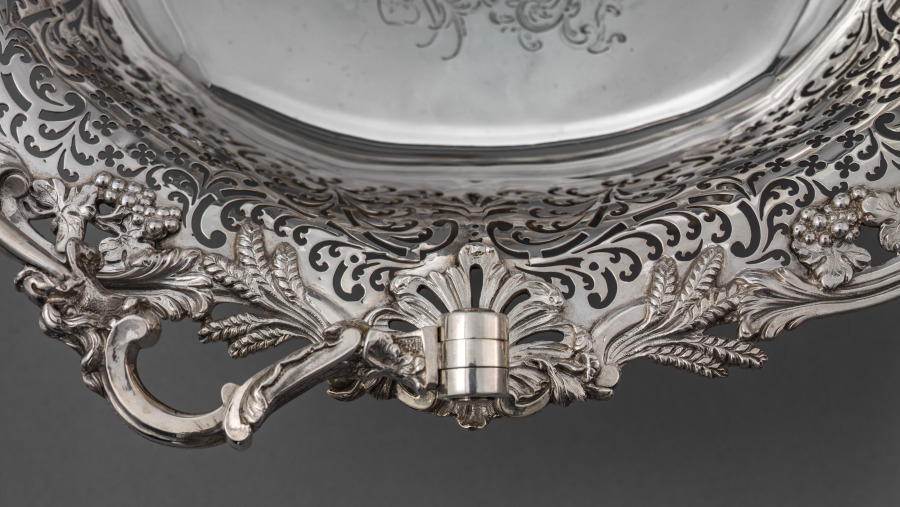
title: Cake Basket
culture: Britain, London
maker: Samuel Herbert and Company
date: 1753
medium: Silver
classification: Silver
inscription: “H/I I”; hallmark for London, George II, Samuel Herbert and Henry Bailey, and date 1753.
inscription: “To/H.H.M./from/S.K., E.W.G., J.H.J., D.R.L., M.B.R./on the occasion of his/Silver Wedding/1911-1936”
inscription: “50-2”; hallmark for London, George II, Samuel Herbert and Henry Bailey, and date 1753.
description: Drinking tea at the end of the day, accompanied by sweet cakes and savory delights, became an established ritual in Britain at all levels of society during the 1700s. In grand houses, silver teapots, caddies, and cake baskets elevated this afternoon refreshment to a formal gathering.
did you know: Sheaves of wheat adorning the rim of this basket allude to the flour used in pastries and cakes for tea.